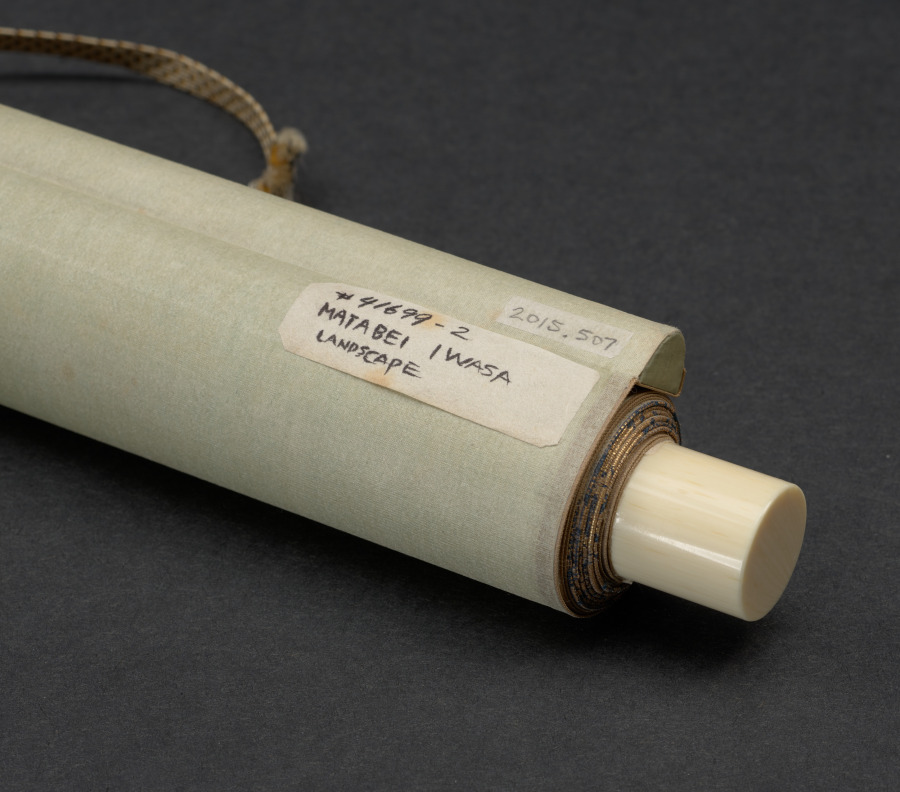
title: Coastal Landscape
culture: Japan, Momoyama period (1573–1615)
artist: Iwasa Matabei (Japanese, 1578–1650)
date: 1573–1615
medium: hanging scroll; ink on paper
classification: Painting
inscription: signed: signature unread